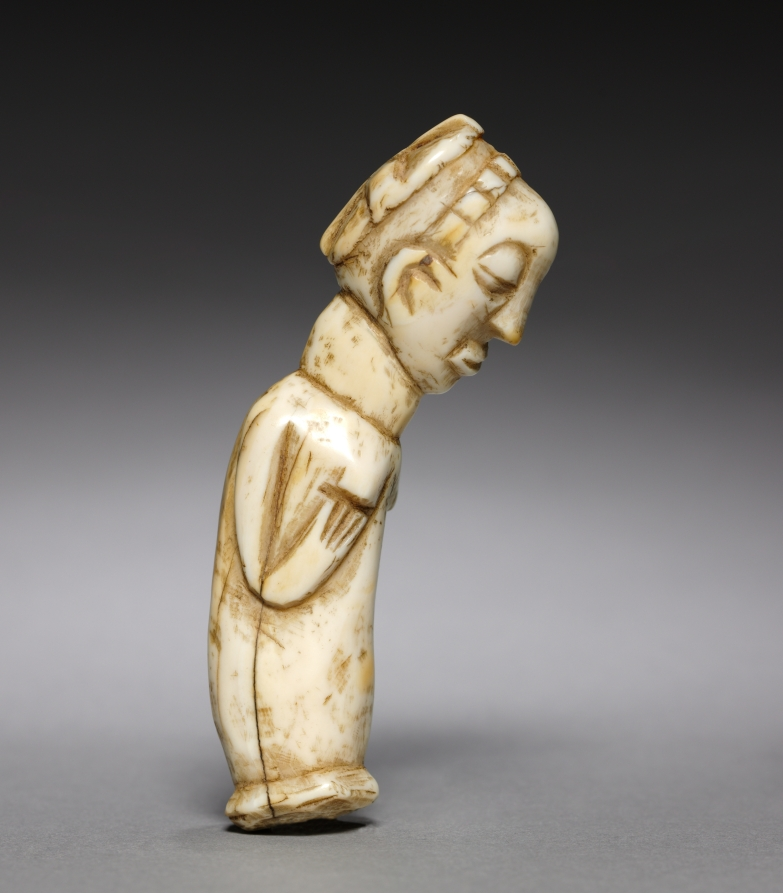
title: Figure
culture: Central Africa, Democratic Republic of the Congo, Luba, 20th century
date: 1900s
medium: ivory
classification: Sculpture